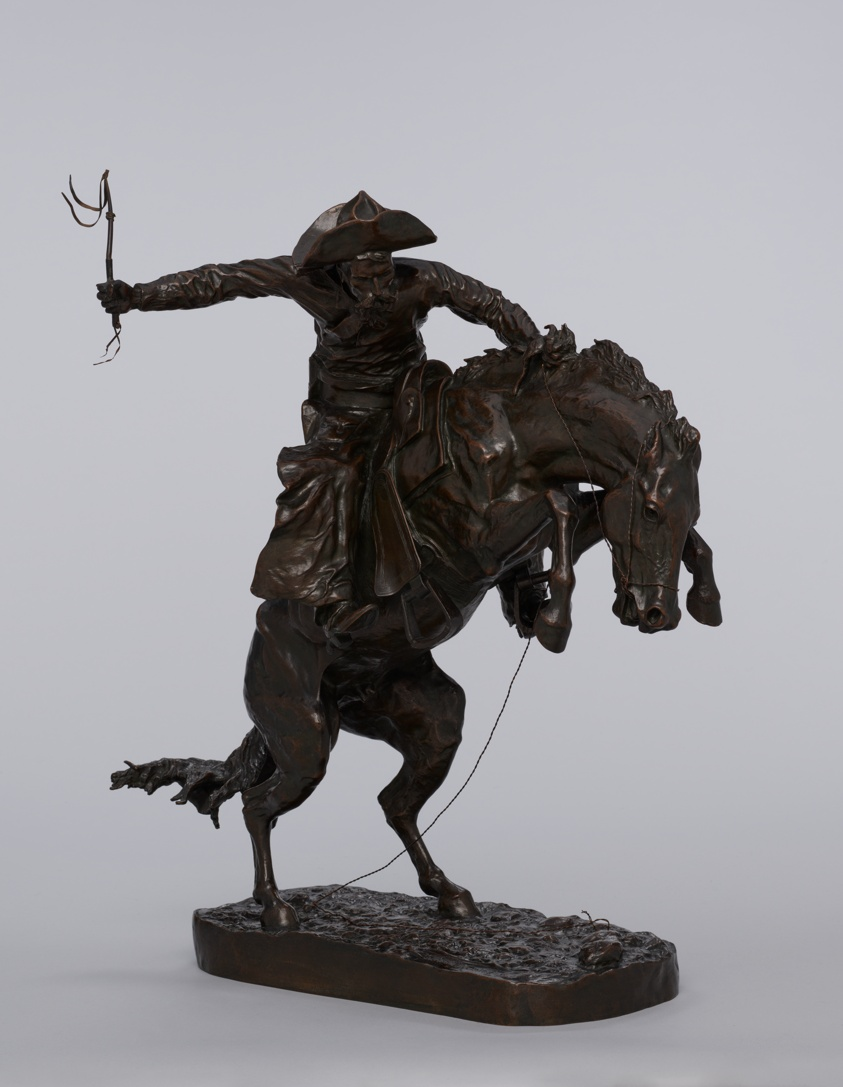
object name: Sculpture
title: The Bronco Buster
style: 19th century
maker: Frederic Remington (American, 1861–1909); Cast by Henry-Bonnard Bronze Co. (American, 19th century)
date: Modeled 1895, cast 1899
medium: Bronze with brown patina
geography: United States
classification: sculpture; american arts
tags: animals, rodeos, cowboys, horses, horseback riding, people, portraits